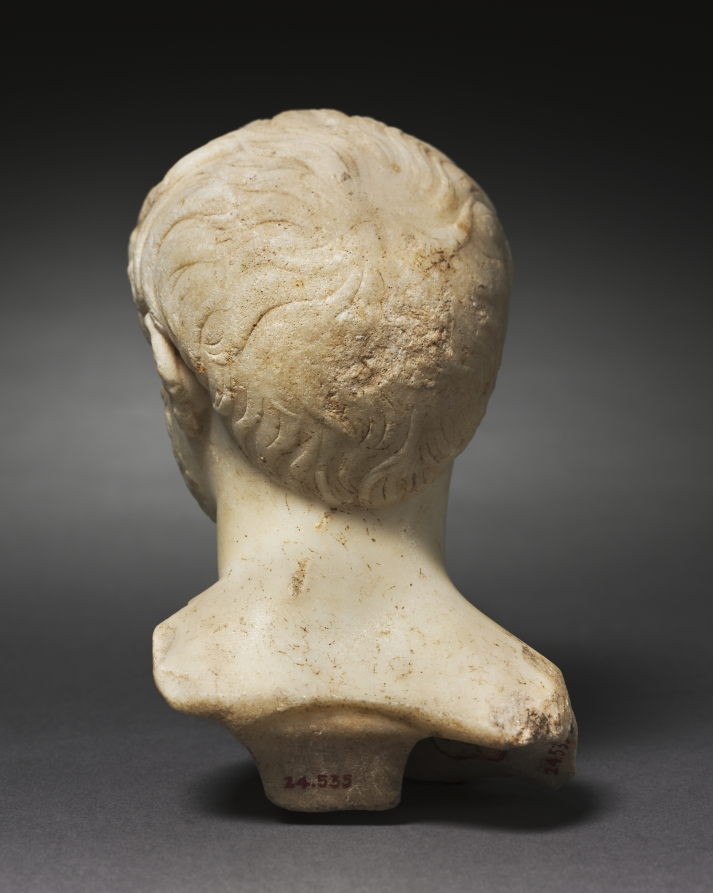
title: Head of a Bearded Man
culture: Italy, Roman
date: c. 125 CE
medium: marble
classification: Sculpture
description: This small-scale portrait depicts a bearded man turned toward his left. His close-cropped hair is combed forward in artful waves, echoed in his short beard. While parts of the chest and shoulders have been lost, the projecting element underneath suggests this portrait was intended as a bust. Beards were uncommon in Rome until the emperor Hadrian (r. 117–38 CE) popularized them during his reign. This man’s grooming is so similar to the emperor’s that he was first thought to be Hadrian; however, the face is too angular. Wealthy and noble Romans would often depict themselves with the same styles as the imperial family.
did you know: This head was probably originally displayed against a wall or in a niche.